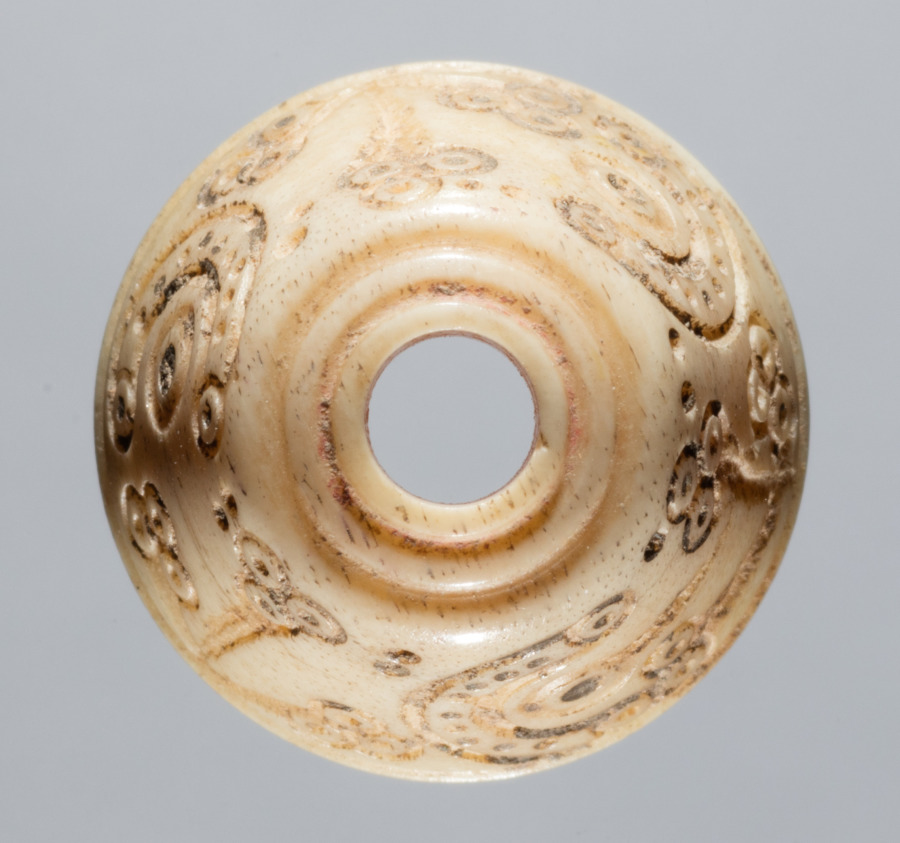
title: Spindle Whorl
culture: Iran, early Islamic period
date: 700s - 900s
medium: bone, incised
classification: Spindle Whorl